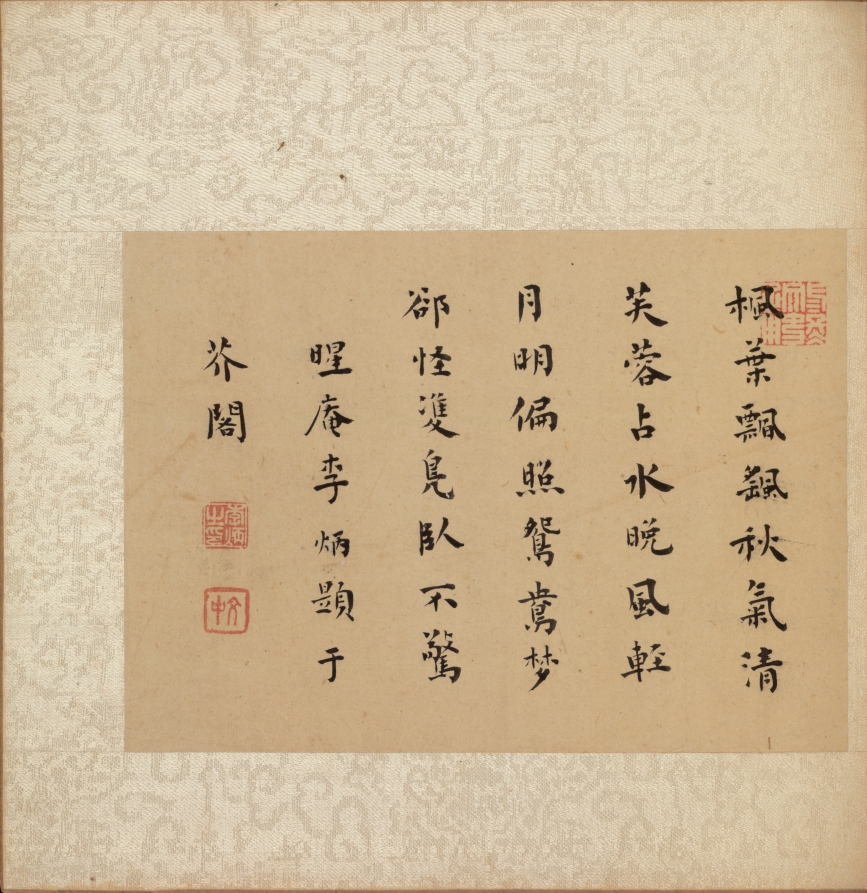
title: Album of Miscellaneous Subjects, Leaf 8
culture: China, Qing dynasty (1644-1911)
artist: Fan Qi (Chinese, 1616–after 1694)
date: early 1650s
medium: album leaf; ink and color on silk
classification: Painting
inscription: Artist seal: Fan Qi 樊圻. Poem by Li Bing 李炳 (17th century): Maple leaves drift in the wind, the autumn gusts bracing,/ Hibiscus flowers steeped with water, the evening breeze light./ The moonlight's slanting beams shine upon dreaming lovers./ No wonder that pair of fowl should dream of the absent partners.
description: Leaf 8 Li Bing's colophon reads: Maple leaves drift in the wind, the autumn gusts bracing, Hibiscus flowers steeped with water, the evening breeze light. The moonlight's slanting beams shine upon dreaming lovers. No wonder that pair of fowl should dream of their absent partners.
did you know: The rock changes from ochre to green deepening into azurite blue accented with delicate dots of malachite green.